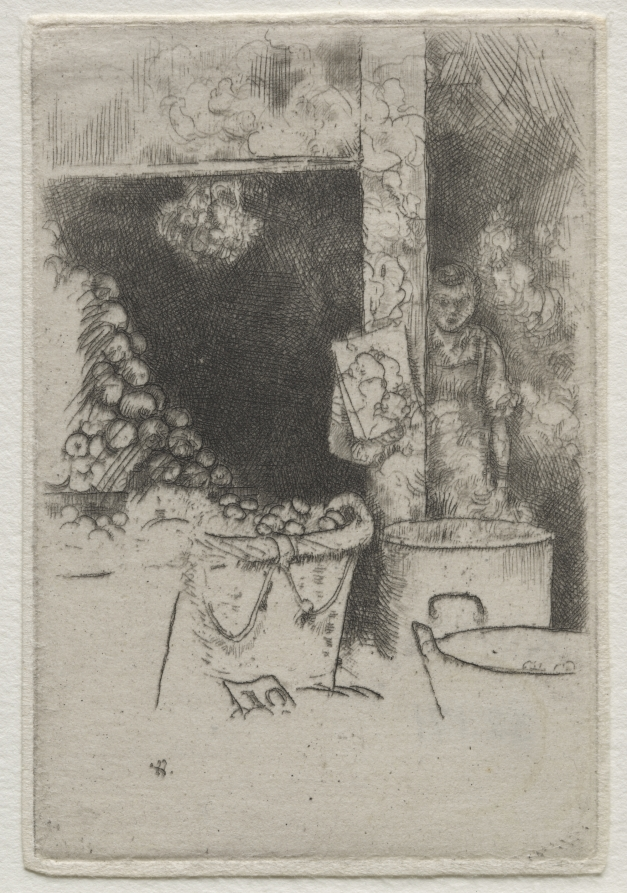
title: Paris: Frying Potatoes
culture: America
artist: Ernest Haskell (American, 1876–1925)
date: 1910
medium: etching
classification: Print